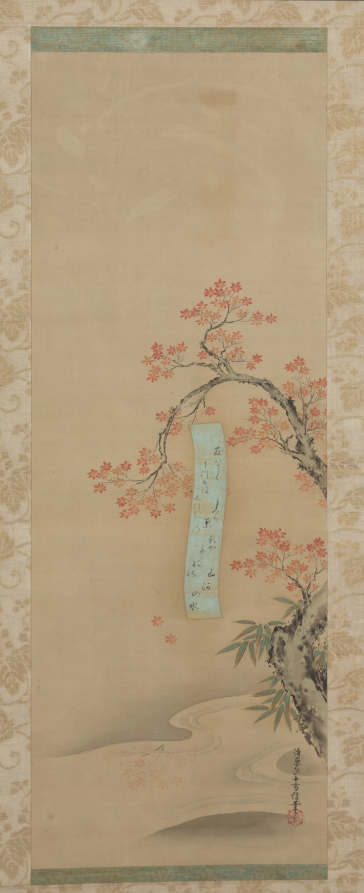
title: Autumn in Takao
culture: Japan, Edo period (1615–1868)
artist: Kiyohara Yukinobu (Japanese, 1643–1682)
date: late 1600s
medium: hanging scroll; ink and color on silk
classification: Painting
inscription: 款記「清原氏女雪信筆」/「清原女」朱文八角印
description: Kiyohara Yukinobu, a native of Kyoto, studied with Kano Tan'yū (1602–1674), the artist-in-residence to the shogun (military ruler) whose official residence was in Edo (Tokyo). Tan'yū traveled extensively because he bore responsibility for the decorative schema and large mural painting programs of the shogunal castles and residences in Nagoya and Kyoto. These were very large projects, requiring the services of legions of craftsmen, including Tan'yū's painting studio. Following her apprenticeship with Tan'yū, Kiyohara established her own career, which featured classical literary themes of the Heian era (10th–12th centuries). This image is set in autumn, and the poem card attached to the maple tree likely signifies the passage of a love affair. Takao is a popular scenic area in the mountains north of Kyoto, where autumn and spring foliage attracts many visitors.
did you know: Kiyohara Yukinobu was one of Japan's earliest and most talented female painters.